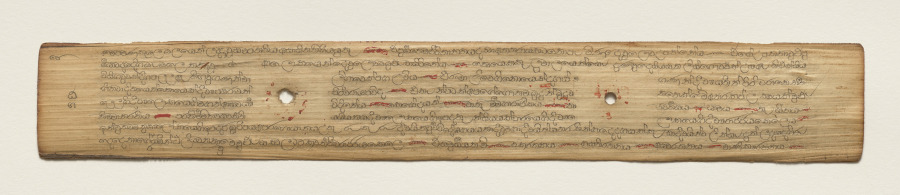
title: Leaf from a Buddhist Manuscript (recto)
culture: Sri Lanka, Singhalese, Late 17th century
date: c. 1700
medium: fiber paper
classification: Manuscript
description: Palm leaf material is still used for manuscripts in Sri Lanka. The palm leaves are prepared first by boiling them, drying them in the sun, and then rubbing them with oils. Scribes then use a metal stylus to incise the text. Then charcoal powder is wiped across the pages, filling in only the inscribed lines.